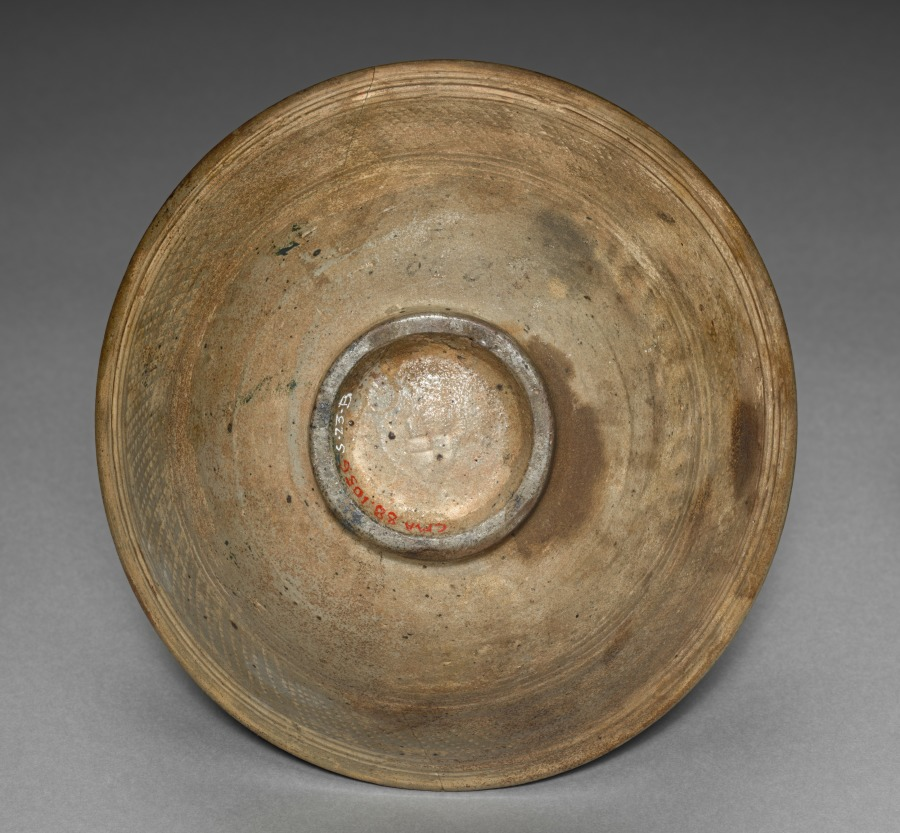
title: Bowl with Stamped Floral Decoration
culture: Korea, Joseon dynasty (1392–1910)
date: 1600s–1700s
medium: glazed ceramic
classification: Ceramic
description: This type of wide-mouthed bowl was used everyday in Korea, not exclusively for tea drinking. But when it was introduced to Japan around the early 16th century, its imperfect appearance evoking the aesthetics of wabi-sabi caused it to be repurposed as tea bowls in Japan. Possibly produced in one of the kilns established by the trading office (Waegwan) in Busan, southern Gyeongsang province, this type of bowl was sold to Japanese elite collectors.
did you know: This type of humble tea bowl was highly praised among Japanese collectors for its imperfect beauty.